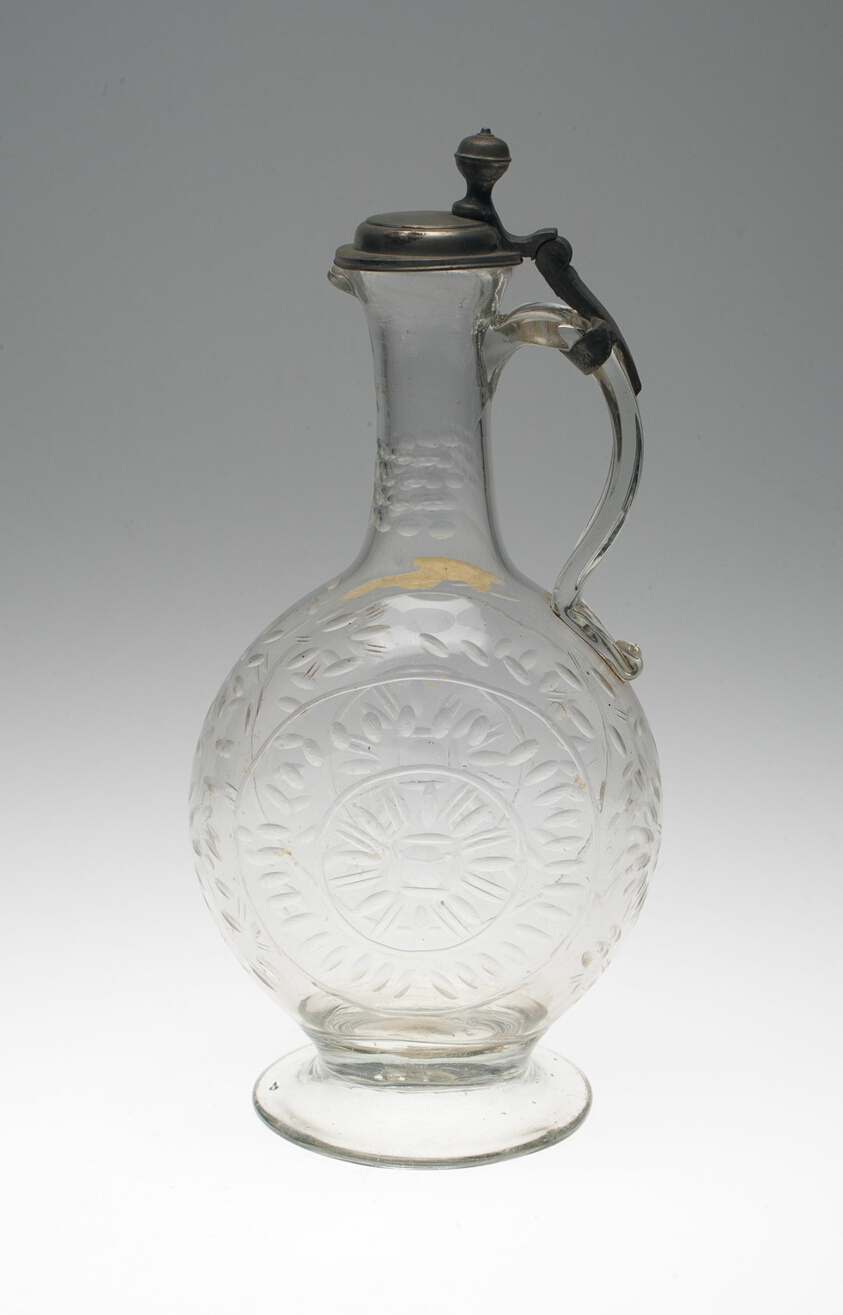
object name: Glass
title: Flagon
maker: Flanders, Belgium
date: 18th century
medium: Glass with pewter mounts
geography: Flanders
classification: glass; european decorative arts